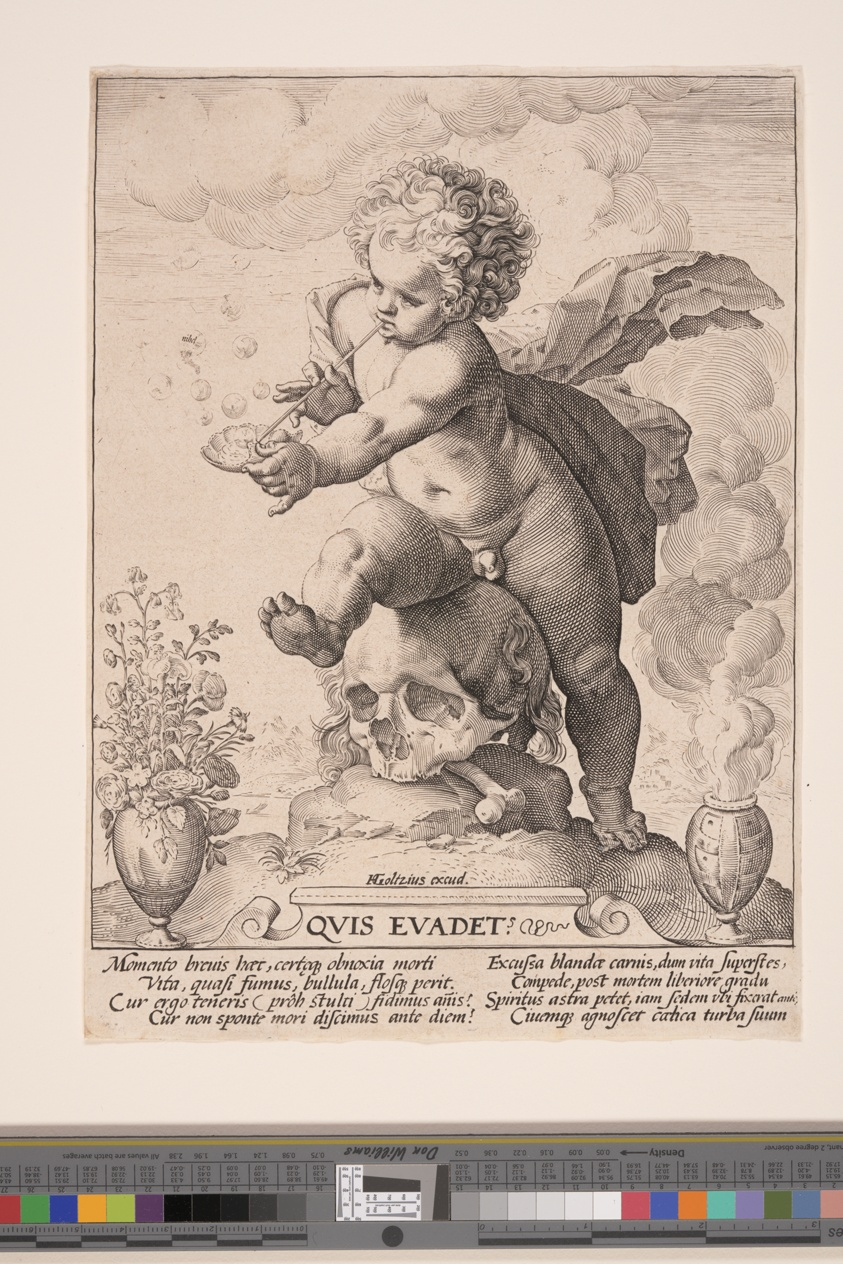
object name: Print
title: Allegory of Transience (Quis Evadet?)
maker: Workshop of Hendrick Goltzius; Dutch, 1558–1617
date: c. 1590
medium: Engraving on laid paper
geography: Netherlands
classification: print; engraving; paper; prints and drawing